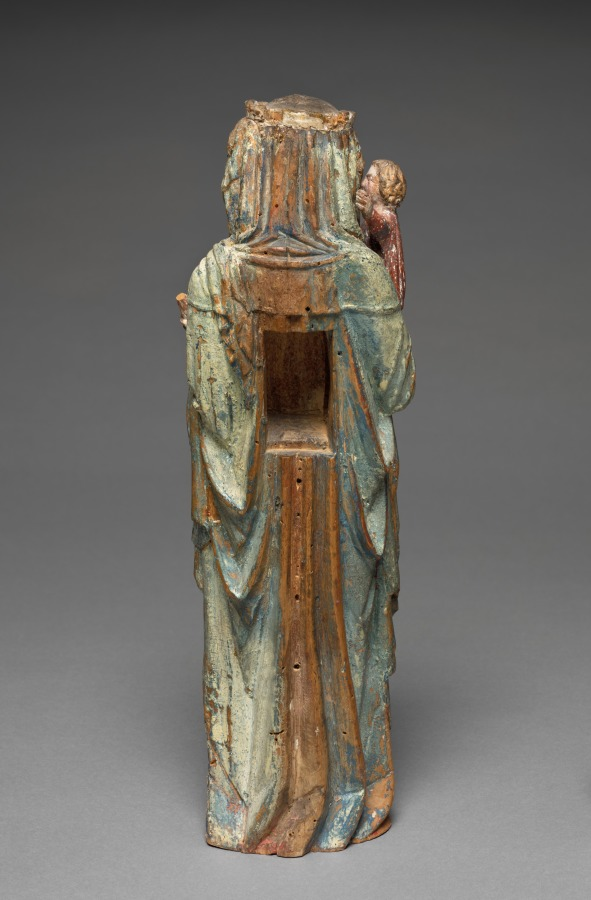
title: Reliquary Statuette of the Virgin and Child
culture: Austria, Salzburg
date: c. 1330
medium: painted lindenwood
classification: Sculpture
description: A small rectangular cavity in the back of this sculpture reveals that it was originally made to serve as a reliquary (a container for relics). In her left hand the Virgin holds a pear, a symbol of the peace and love of Christ.